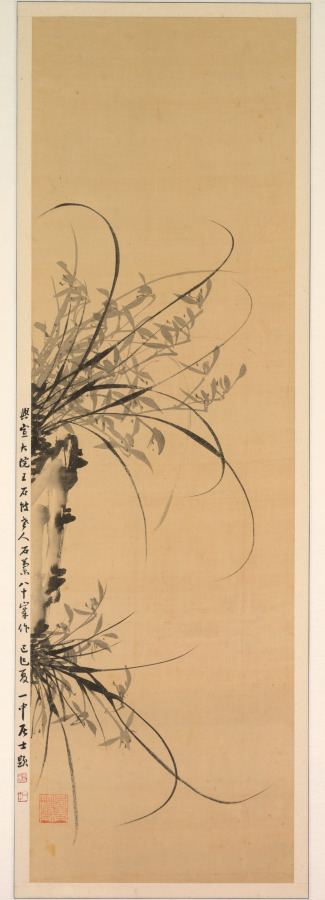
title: Orchids and Rocks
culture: Korea, Joseon dynasty (1392–1910)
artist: Yi Ha-eung (Korean, 1820–1898)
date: 1897–98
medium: Eight-panel folding screen; ink on silk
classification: Painting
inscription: Translation: [I] painted for the high minister Yangwon. [I] humbly request your corrections and advice [on my painting]. [By] an eighty-year old gentleman of rocks.)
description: Yi Ha-eung (1820−1898), the artist of this eight-panel folding screen, was one of the most influential men in late 19th-century Korea. Acting as the regent for his son, King Gojong (1852−1919), who ascended the throne at the age of thirteen, Yi ruled Korea from 1866 to 1873. In addition to his illustrious political career, Yi was also recognized as one of the most celebrated artists who led the revival of literati art in late 19th-century Korean art. In particular, he was recognized as the master of orchids, one of the “Four Gentlemen” (plum, orchid, chrysanthemum, and bamboo) themes. Solely relying on monochrome ink, Yi depicted the curvilinear silhouettes of cymbidium orchid leaves dramatically hanging down from cliffs. Growing in wilderness and redolent with fragrance, orchids were often associated with the perseverance of principled gentlemen, and thus became one of the most popular subjects of scholar-artists' paintings.On the upper right corner of the far left panel, Yi wrote a short inscription stating that he painted the work at the age of 80.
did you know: The artist of this elegant painting is the formidable politician Yi Ha-eung (1820–1898), who is known for a seclusion policy that aimed to protect Korea and its sovereignty from foreign influences.